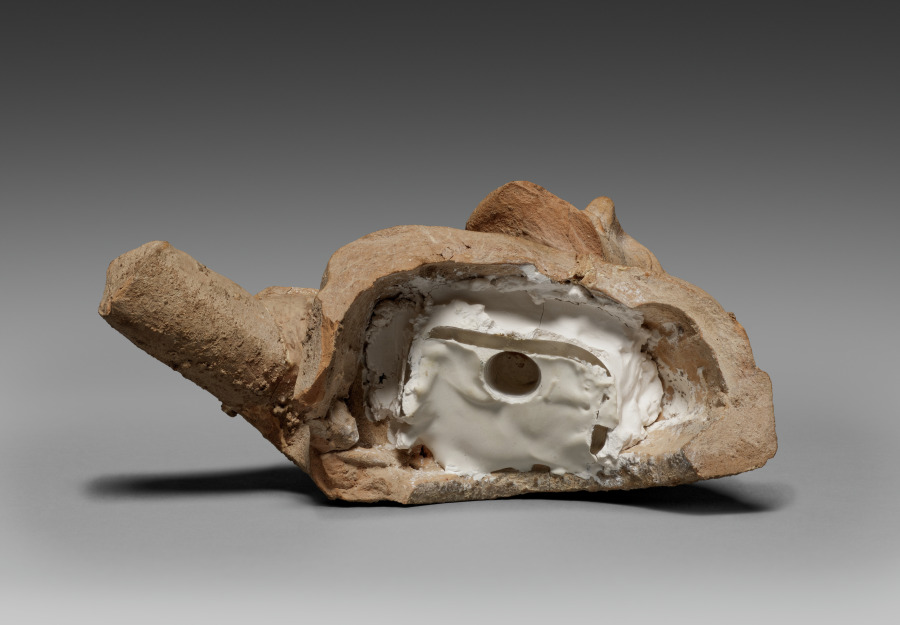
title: Fragment of a Reclining Male Figure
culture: Greek/South Italian, Taranto (ancient Taras)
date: 450–350 BCE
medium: terracotta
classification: Sculpture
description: This terracotta figure depicts a bearded man with his head tilted toward his left shoulder, suggesting that he is reclining. At Greek banquets, the attendees reclined while eating. Banquet imagery was very popular, including in the Greek colonies in Italy. This man likely originally had an elaborate headdress separately made and attached over the smooth part of the head. The clay on the figure’s right shoulder is probably the remains of “ribbons” attached to his headdress. There are traces of red pigment in the hair.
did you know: Tarantine terracotta banqueters were made from molds, with additional handmade details.